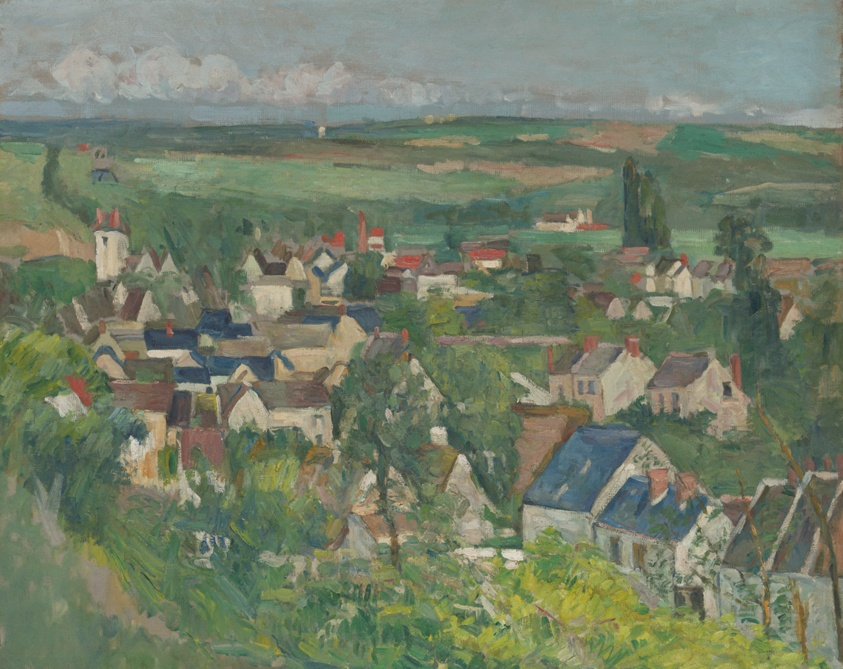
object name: Painting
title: Auvers, Panoramic View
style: Impressionism, 19th century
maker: Paul Cezanne (French, 1839–1906)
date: 1873-75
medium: Oil on canvas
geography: France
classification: painting; french; oil on canvas; oil paintings (visual works); paint; european painting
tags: Century of Progress, building, buildings, countryside, France, hills, homes, house, houses, sky, towns, townscapes, trees, weather/seasons, landscapes, world's fairs, Chicago World's Fairs